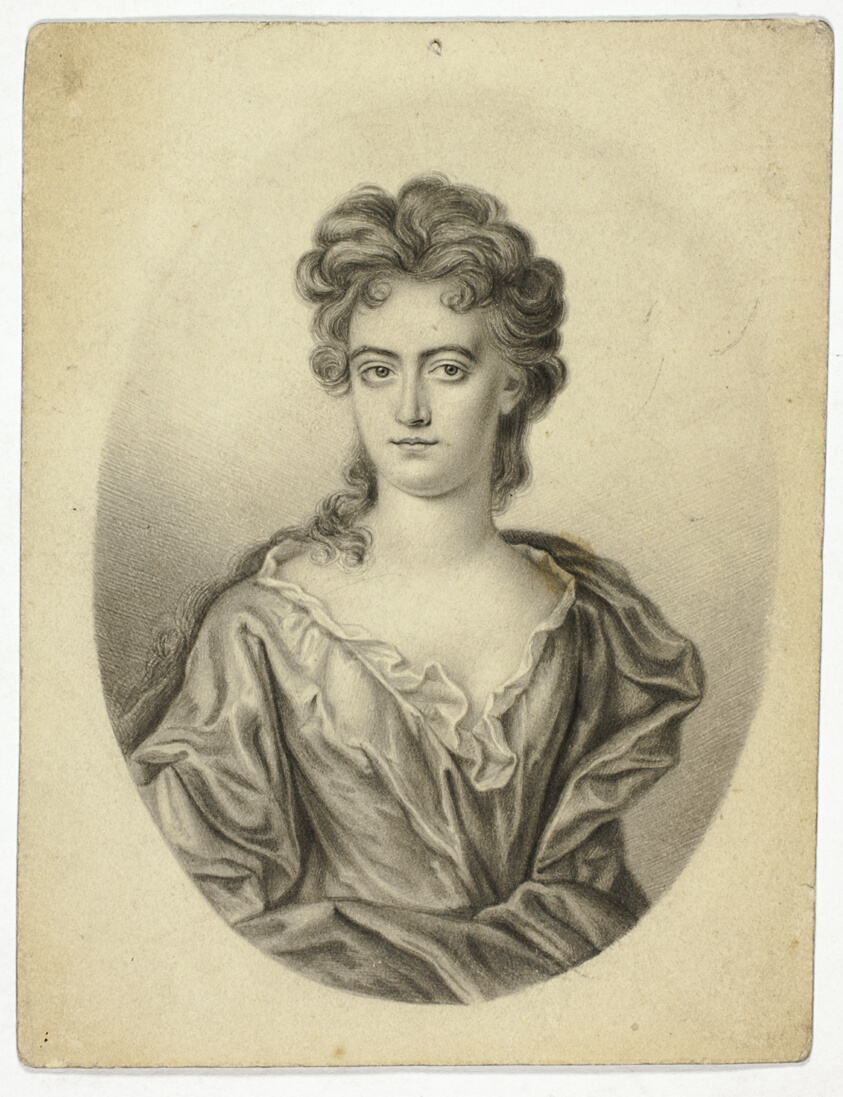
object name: Drawing and Watercolor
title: Queen Anne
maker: Possibly the circle of Thomas Forster; English, flourished 1695-1712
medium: Graphite on cream wove paper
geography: England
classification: ink or chalk wash; drawings (visual works); prints and drawing